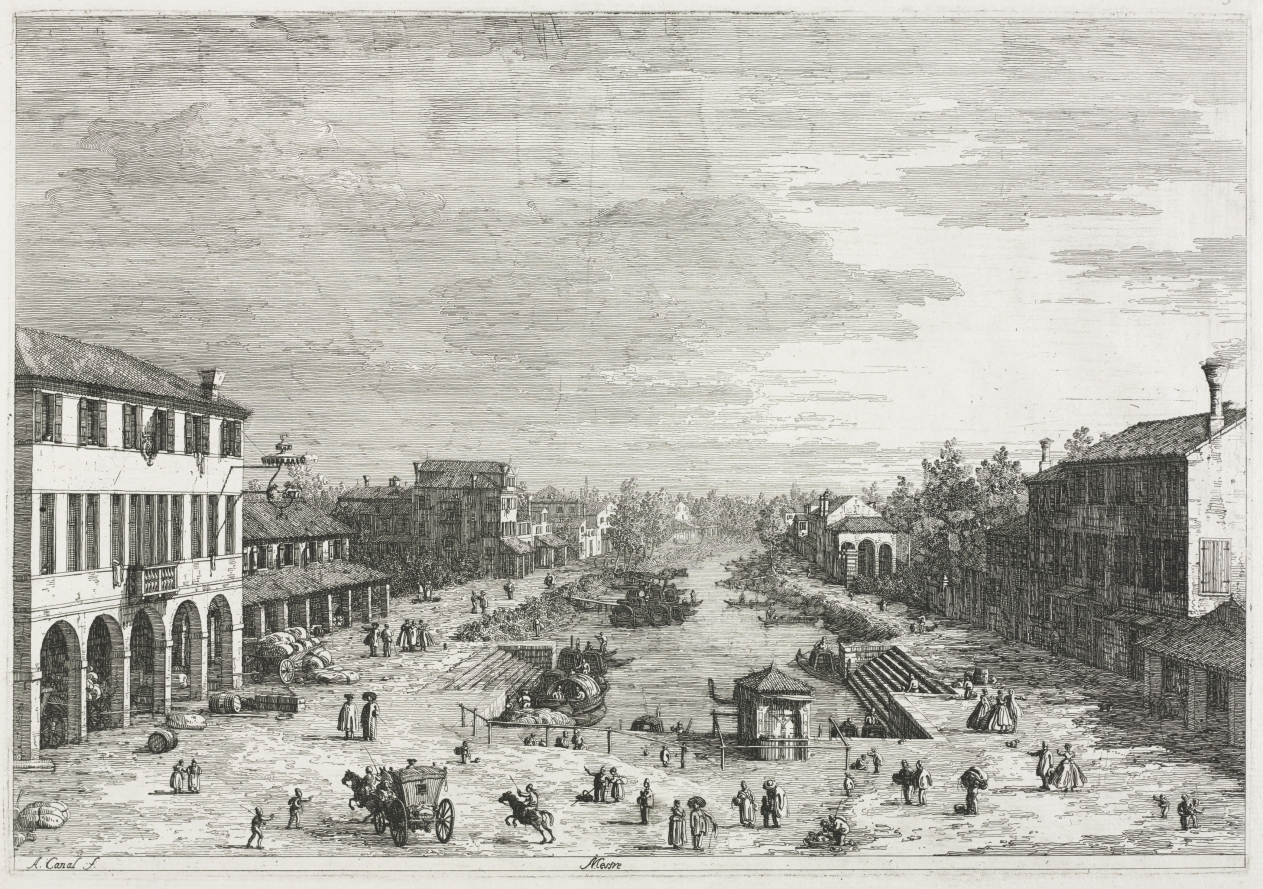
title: Views: Views of Mestre, a Town in the Province of Venice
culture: Italy, Venice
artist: Antonio Canaletto (Italian, 1697–1768)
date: 1735–46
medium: etching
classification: Print